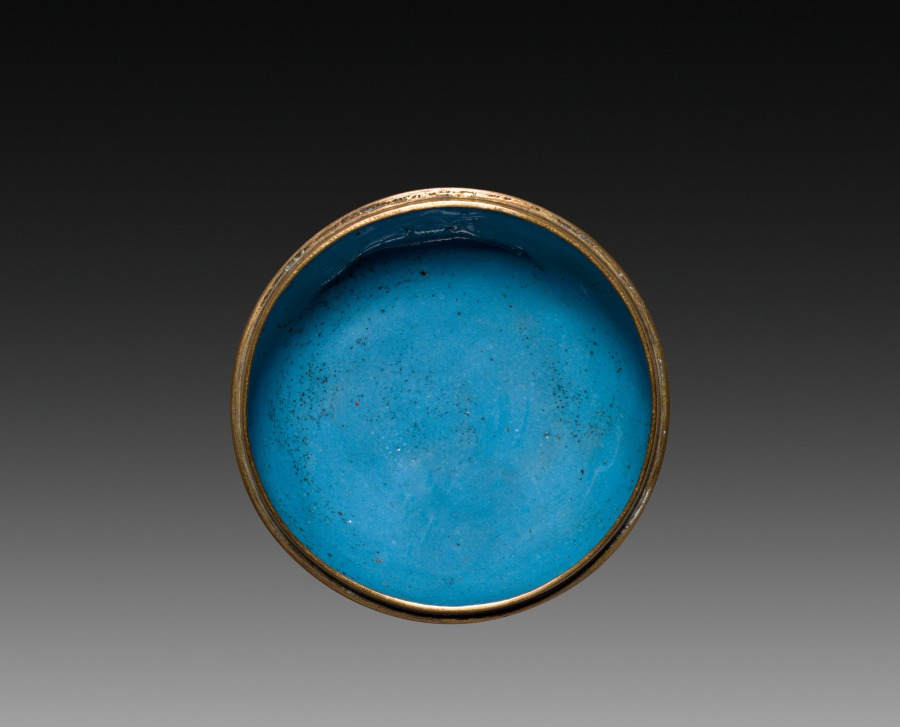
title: Box with Dragon (base)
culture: Japan, Meiji period (1868–1912) or Taishō period (1912–26)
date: c 1900– 1925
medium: cloisonne enamel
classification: Enamel